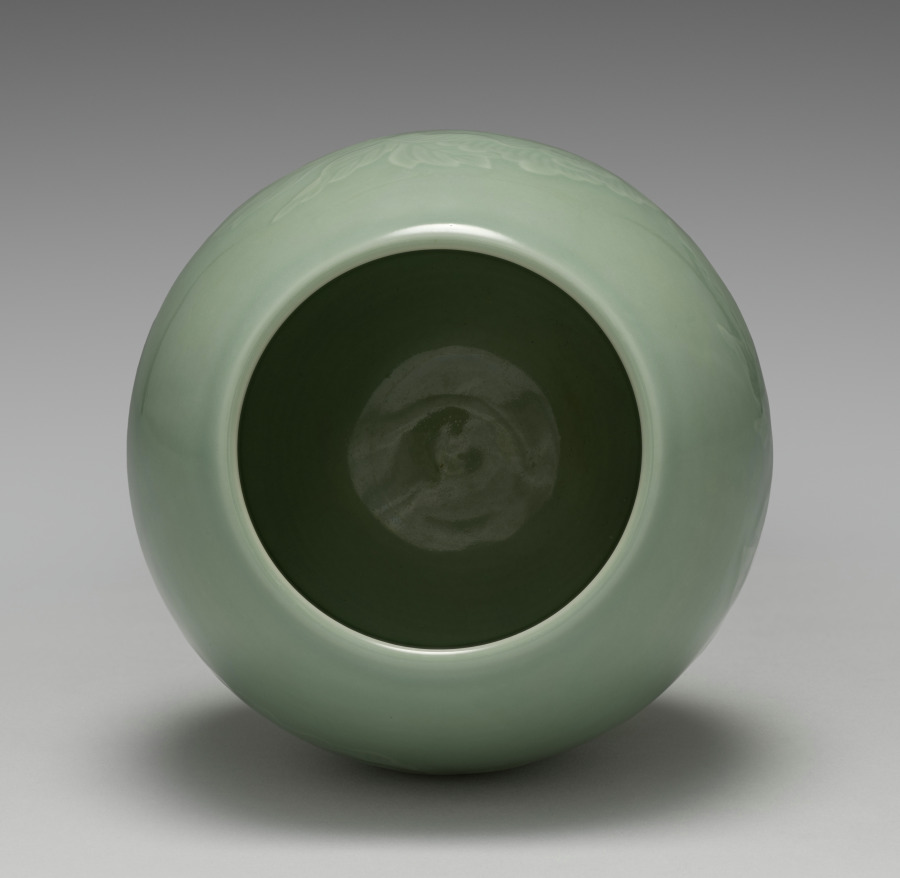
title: Water Container with Peonies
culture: Japan, Meiji period (1868–1912)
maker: Seifū Yohei III (Japanese, 1851–1914)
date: 1900–1914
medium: Porcelain with molded and carved design, green glaze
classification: Ceramic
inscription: 清風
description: This ceramic is an especially accomplished example of Yohei III’s combination of an all-over translucent colored glaze with molded and carved designs. It features the peony as its primary motif. The water container, or mizusashi, has a green glaze, and its design takes into consideration the rounded shape and the seated position of the host and guests. It begins low on the body with a flower just beginning to open and continues with another flower a bit higher up, with its petals fully extended and beginning to open outward. It finishes with a flower in full bloom, petals and leaves unfurled and spread outward from the center, now occupying almost the entire surface. The water container once belonged to the Hosokawa family, whose go-between corresponded with Yohei IV about the piece. Yohei IV thanked them for their payment and requested that despite his father’s death in the previous year, they continue to favor the studio with their orders. The letter and its envelope, as well as an auction tag, remain with the object.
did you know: Yohei III often made chanoyu pieces for select clients, as documented by letters still preserved with this water container, or mizusashi.